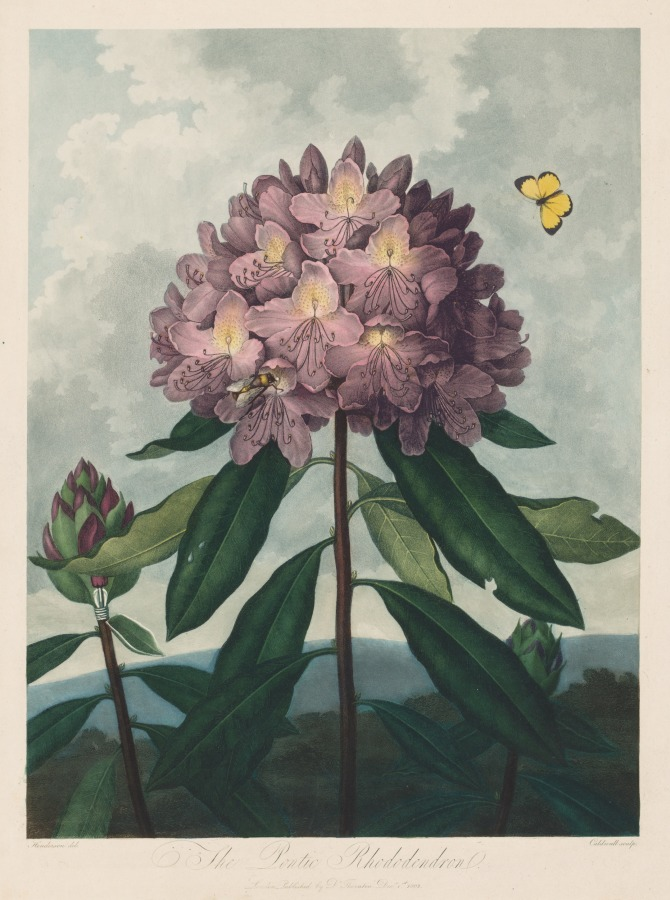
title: The Temple of Flora, or Garden of Nature: The Pontic Rhododendron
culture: England, late 18th-early 19th Century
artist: Robert John Thornton (British, 1768–1837)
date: 1799–1807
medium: aquatint, stipple and line engraving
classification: Print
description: In the 18th century, new engraving and etching techniques offered a variety of tonal effects that enhanced botanical prints. While mezzotint (in which the plate is roughened and then the engraver works from dark to light creating different values) and stipple (dots create values) make it possible to create the rich tonal scale and velvety texture of oil paint, aquatint imitates the delicacy and transparency of watercolor and ink wash.